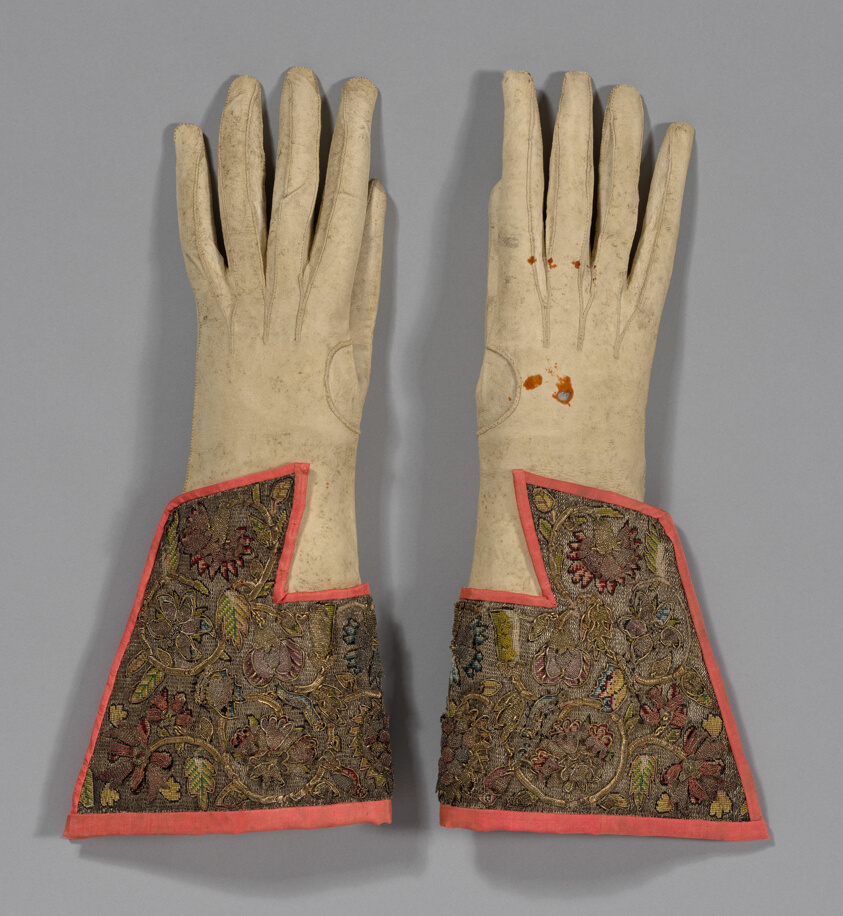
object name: Textile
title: Pair of Men's Gloves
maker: England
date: 1625/50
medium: Gloves: white kid leather; gauntlets: linen, plain weave; embroidered with silk, gilt- and silvered-metal-strip-wrapped silk, and gilt- and silvered-metal purl, coiled wires, and spangles in detached buttonhole, padded detached buttonhole, plaited braid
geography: England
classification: textile; needlework (visual works); costume accessory